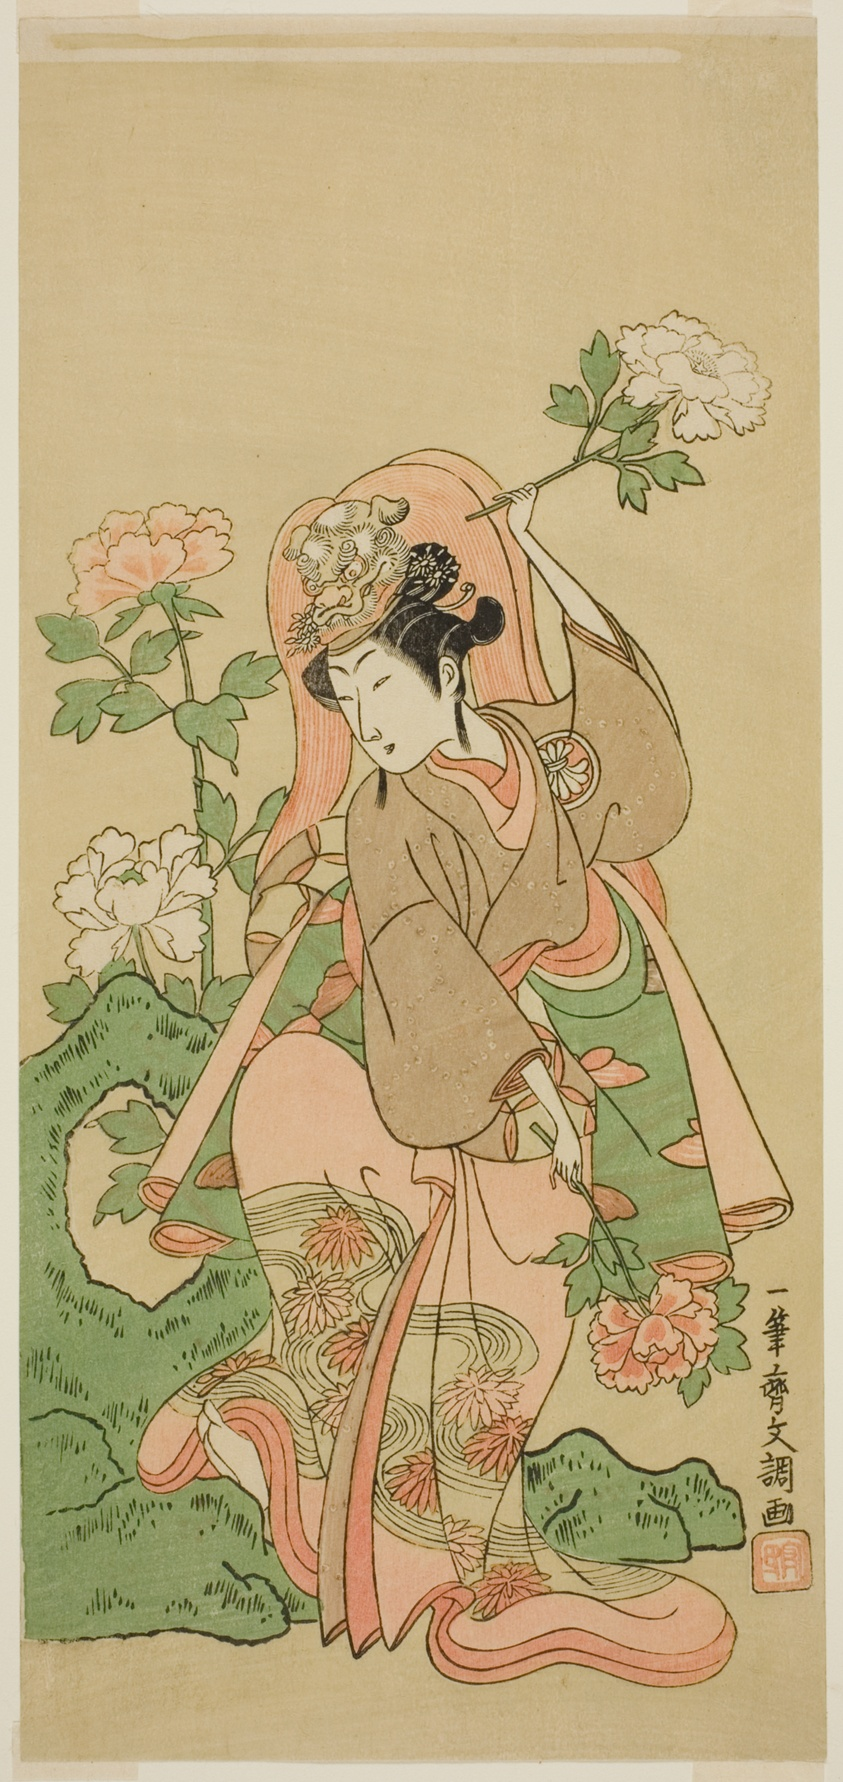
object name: Print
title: The Actor Segawa Kikunojo II in Shakkyo Dance in the Play Soga Moyo Aigo no Wakamatsu, Performed at the Nakamura Theater in the Second Month, 1769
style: Japanese (culture or style)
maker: Ippitsusai Buncho (Japanese, active c. 1755-90)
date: c. 1769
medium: Color woodblock print; hosoban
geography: Japan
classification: print; asian art